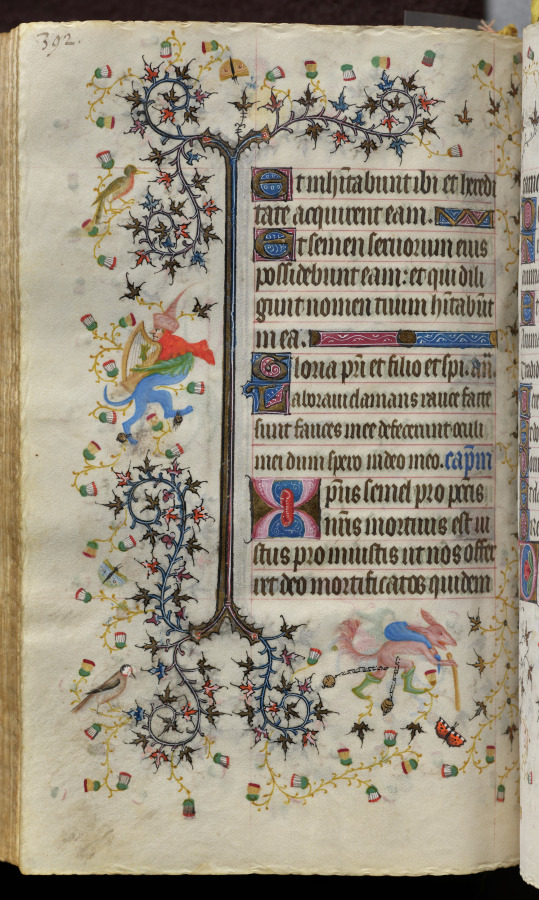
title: Hours of Charles the Noble, King of Navarre (1361-1425): fol. 190v, Text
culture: France, Paris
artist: Master of the Brussels Initials and Associates (French)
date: c. 1405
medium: ink, tempera, and gold on vellum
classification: Bound Volume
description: This precious volume was obviously highly prized by its owner, the French-born King of Navarre, who had his coat of arms painted on no less than twenty folios. Rather than directly commissioning this manuscript from a specific workshop, it seems that Charles the Noble acquired his book of hours -- perhaps ready-made for the luxury market -- while on a trip to Paris in 1404-05. A collaborative effort, six painting styles are evidenced within the pages of this codex, those of two Italians, two Frenchmen, and two Netherlanders. The painter who was responsible for the planning and decoration of the book, and who produced seventeen of the large miniatures, was a Bolognese artist known as the Master of the Brussels Initials. His principal assistant, responsible for most of the borders, was a Florentine who signed his name "Zecho" da Firenze on folio 208 verso.